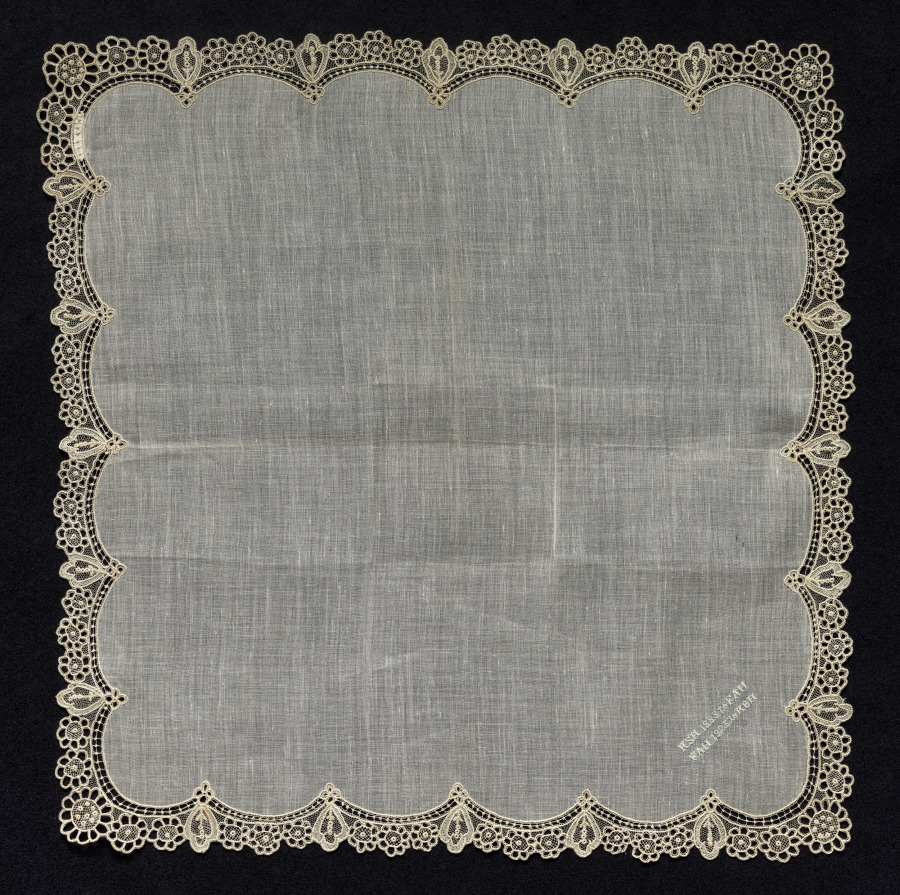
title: Lace Handkerchief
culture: Belgium, Brussels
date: 1860–99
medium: Plain weave linen center; needle lace (point de gaze) edging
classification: Lace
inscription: embroidered inscription in one corner: "K- S- H 1888 to F. A. H., F. A. H. - 1923 to K. B. H."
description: This Point de Gaze lace handkerchief is embroidered with an inscription in one corner: K- S- H 1888 t F. A. H. 1923 to K. B. H.